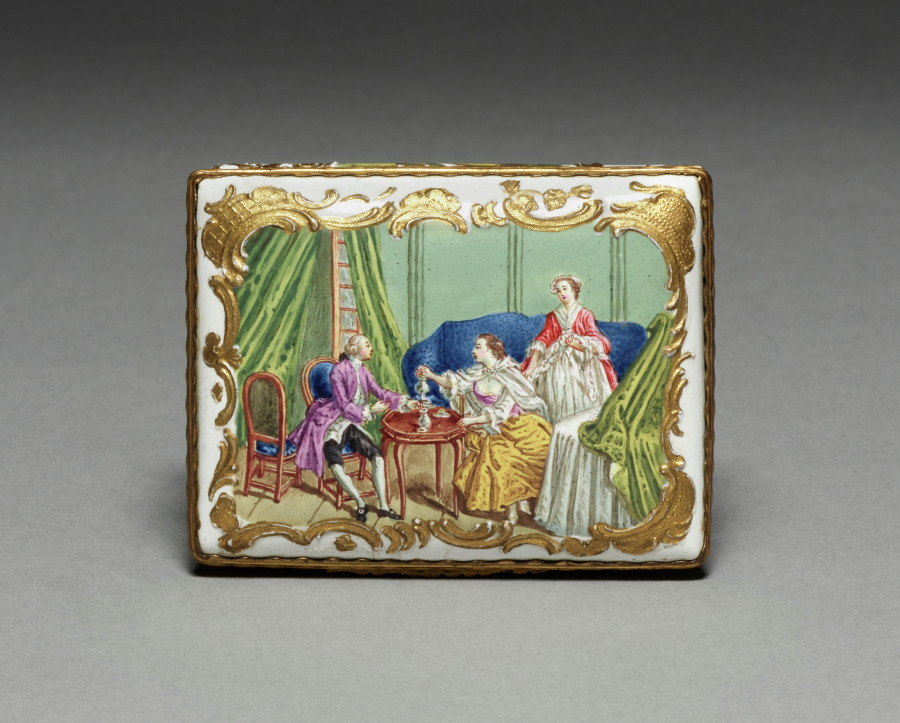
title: Box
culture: England, 18th century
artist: South Staffordshire Factory (British)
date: 1760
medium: enamel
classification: Enamel